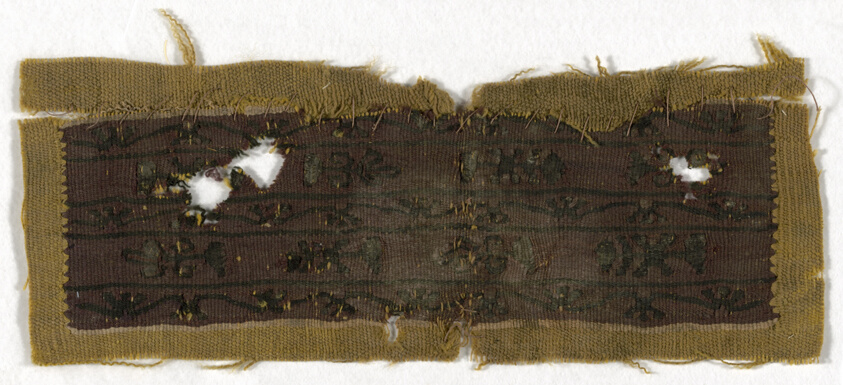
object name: Textile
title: Sleeve Band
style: roman period (egyptian), greco-roman (egyptian)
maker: Coptic; Egypt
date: Roman period (30 B.C.– 641 A.D.), 1st/5th century or 4th/6th century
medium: Linen and wool, slit tapestry weave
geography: Egypt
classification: textile; weaving; costume; dress (garment); clothing